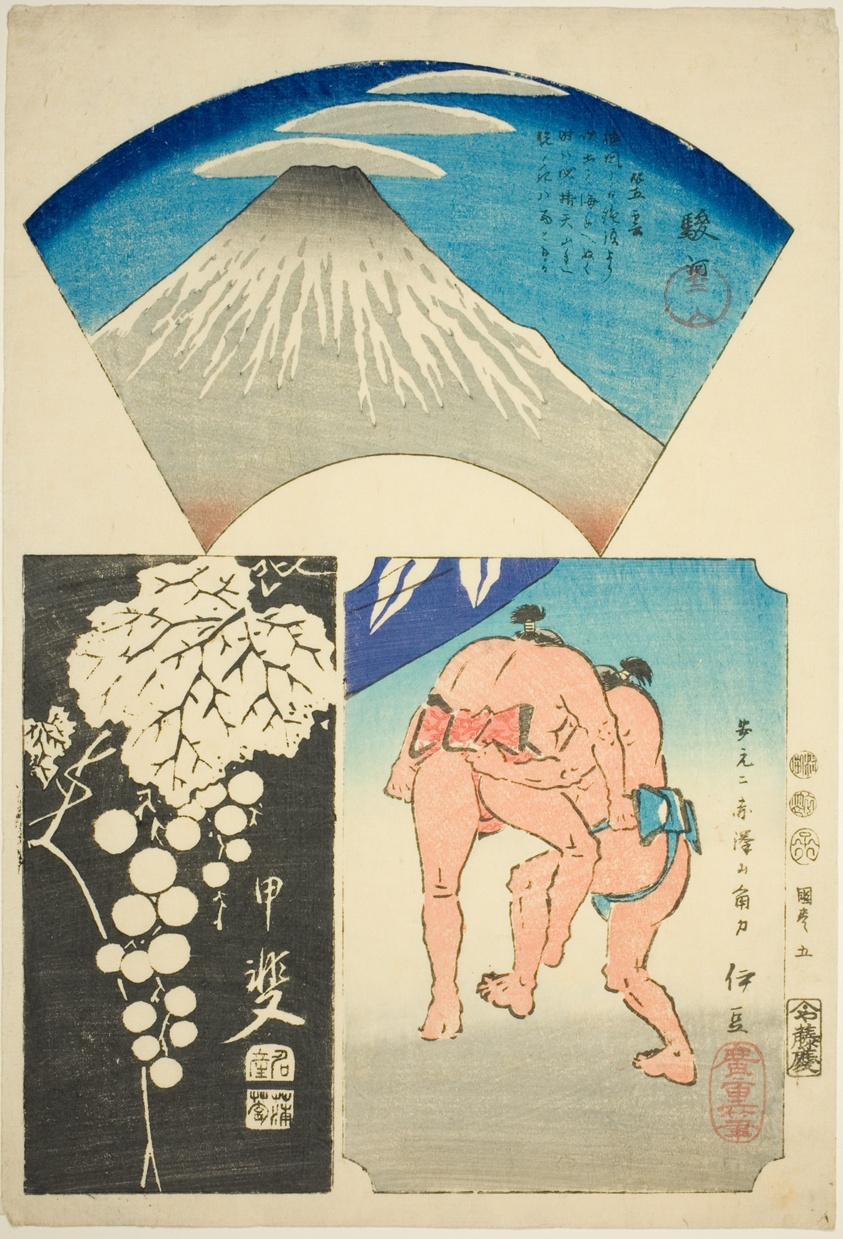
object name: Print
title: Suruga, Kai, and Izu, no. 5 from the series "Cutout Pictures of the Provinces (Kunizukushi harimaze zue)"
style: Japanese (culture or style)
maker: Utagawa Hiroshige 歌川 広重; Japanese, 1797-1858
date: 1852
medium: Color woodblock print; oban, harimaze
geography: Japan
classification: woodblock print; print; asian art